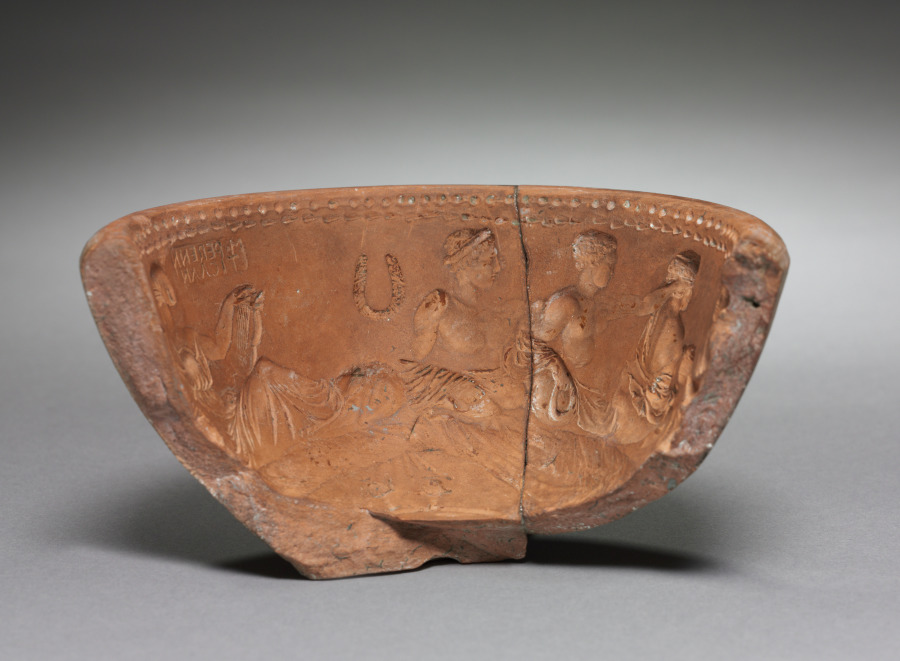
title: Fragment of a Mold for Arretine Bowl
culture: Italy, Roman, Augustan period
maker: M. Perennius (Roman, c. 100 BCE–100 CE)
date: 27 BCE–14 CE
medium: terracotta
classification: Ceramic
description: Preserving nearly half of a mold for a relief-decorated terracotta bowl, these joining fragments show women and youths reclining at a symposium. On one side, a woman passes a bowl or cup to a youth, whom another youth reaches over to crown with a garland or wreath. A third youth reclines beside them, and a second woman sits on the next couch, looking away and holding a lyre on her raised knee. Above, within a stamped rectangle, appears the signature M. PERENN | TIGAANI.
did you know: This mold includes an artist signature, reversed to appear properly in the final product.